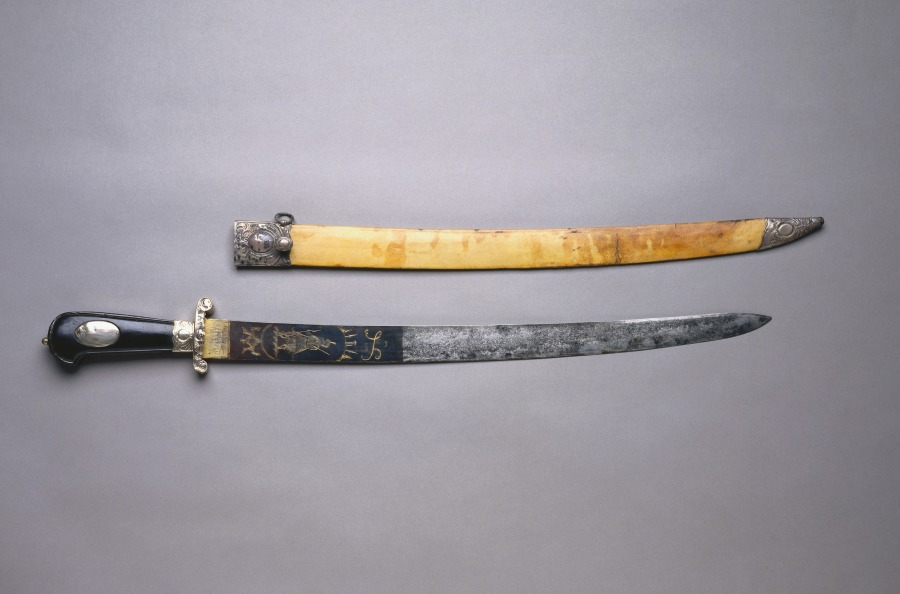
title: Hunting Sword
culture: France (blade: Germany?), 18th century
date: c. 1780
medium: steel, blued, etched, and gilded; silver and wood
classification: Arms and Armor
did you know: This custom-made German hunting sword, displayed with its original scabbard, was used at the end of a hunt in order to deliver the killing blow. After the game was dispatched, this type of sword was also used to field dress the animal, which must be done as quickly as possible to preserve the usable meat. It could also be used for self-defense against dangerous animals.